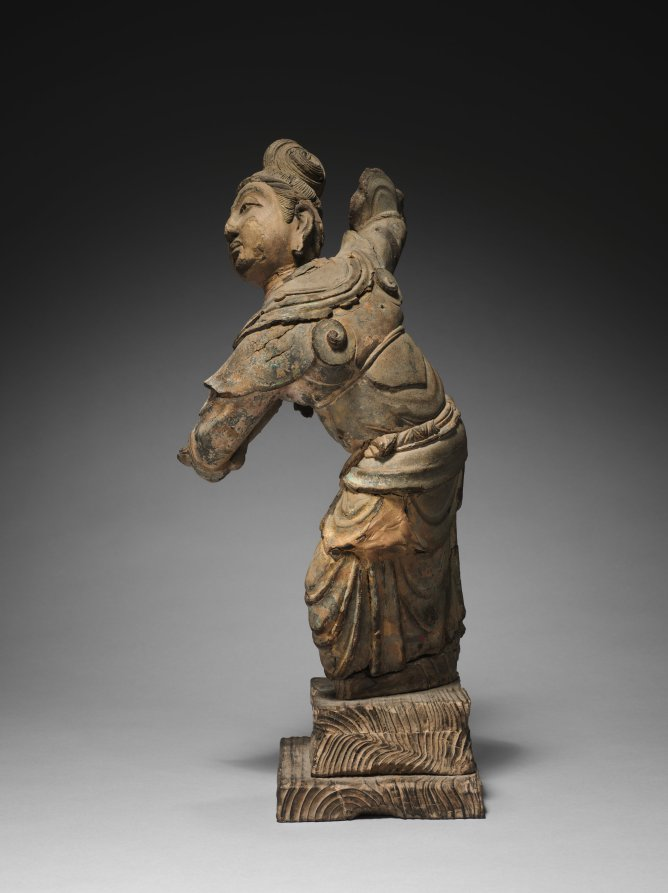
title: Dancing Apsaras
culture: China, late Tang dynasty (618–907) to Five dynasties (907–960)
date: 900s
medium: dry lacquer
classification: Sculpture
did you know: The sculpture was made from a rare technique involving alternate layers of cloth and lacquer, modeled on an armature or around a removable clay core.